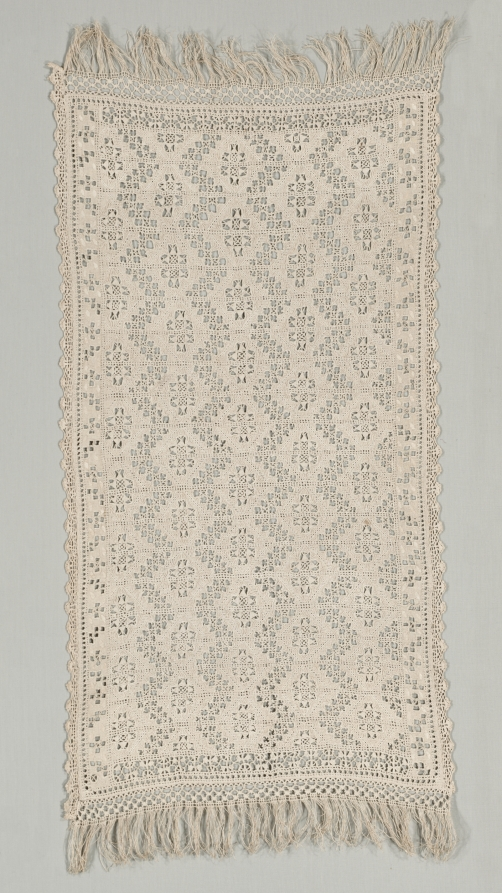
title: Table Cover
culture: Italy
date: 1500s–1600s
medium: Linen: needle lace (cutwork) and bobbin lace edging and embroidery (curl stitch and satin stitch)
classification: Lace